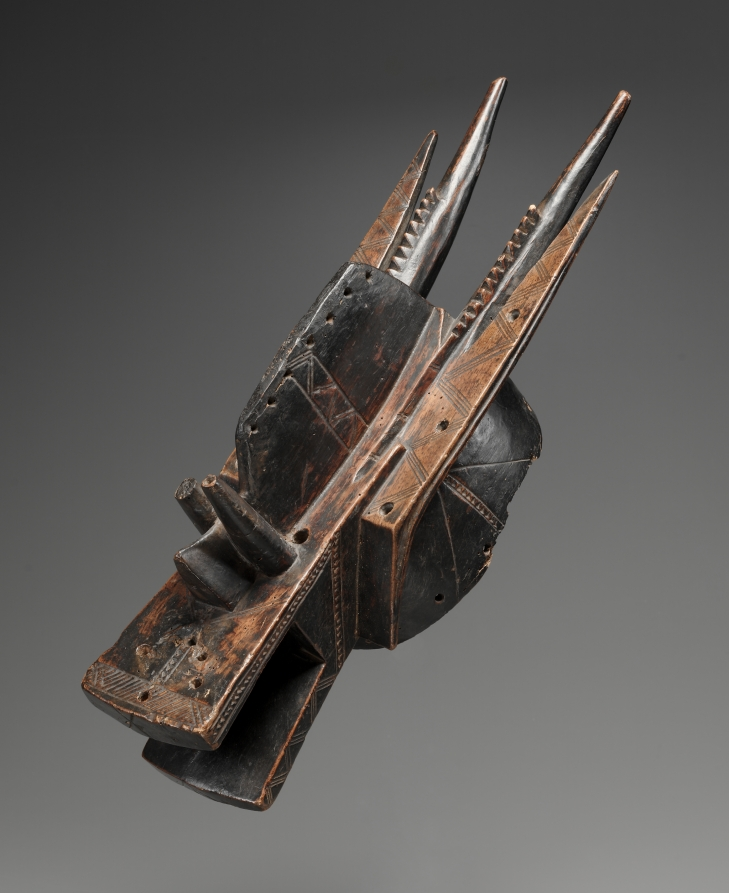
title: Helmet Mask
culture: Africa, West Africa, Mali, Malinke-style blacksmith-carver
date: mid- to late 1800s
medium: Wood and probably resin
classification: Mask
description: Combining animal and human traits, this example of a genre of mask called suruku, meaning “hyena,” most likely belonged to the Korè, one of six power associations that the Malinke would have adopted from their Bamana neighbors. The Korè is concerned with the circumcision and initiation of male youths into adulthood. The mask probably served as one of the symbols of the different Korè classes.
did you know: Holes along the top ridge of this mask once held a crest made of cane, red fibers, and cowrie shells.